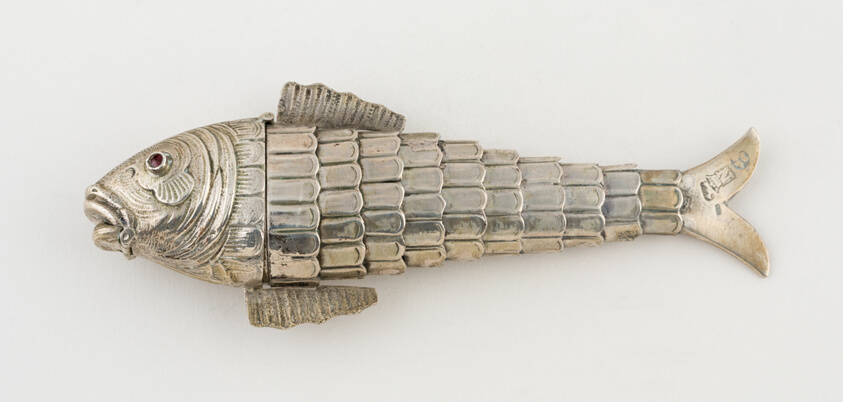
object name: Metalwork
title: Box in the Form of a Fish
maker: Netherlands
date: mid 19th century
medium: Silver, silver gilt, and red glass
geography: Netherlands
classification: container for personal use; box; european decorative arts; metalwork; silver; decorative object/ornament